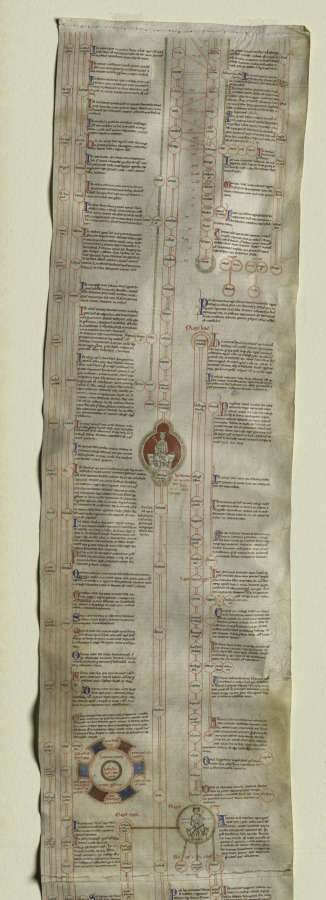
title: Peter of Poitiers's "Compendium Historiae in Genealogia Christi"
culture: England, Canterbury, 13th century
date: c. 1220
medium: ink and tempera on a vellum roll of four membranes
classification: Manuscript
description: This manuscript roll, composed of four membranes formerly stitched together in a continuous roll about nine feet long, has been divided in the middle for easier visibility and study. The text is an abridgment of biblical history focused on the descent of Christ from Adam. It was written by Peter of Poitiers (about 1130–1205), who taught theology and history in Paris and was widely copied. The present roll is an English copy of Peter's text made shortly after his death. Although manuscript rolls were hung on the walls of a classroom as instructional aids to students, some of them have value beyond their textual and historical interest because of the fine quality of their drawings, as seen here. A comparison with Canterbury manuscripts and stained glass of around 1220 is the basis for the attribution to Canterbury. Peter of Poitiers's aim in this project was to assist students prevented from mastering biblical history because of its length and because they were too poor to own books. His text on roll is the briefest possible summary of biblical history. It is arranged in six historical stages, denoting the six ages of the world, as decreed by theological tradition. The first five ages were inaugurated by Old Testament individuals: Adam, Noah, Abraham, David, and Sedecias. The birth of Christ heralded the sixth stage. Beginning at the top of the first membrane, the text consists of brief biographical entries on the ancestors of Christ (Adam, Noah, Abraham, Moses, and David) and other biblical personalities. These extend to the birth of Christ on the fourth membrane, ending with accounts of Hebrew and Roman kings and the Apostles. Each compendium shows the names of the ancestors inscribed within circles, those of direct descent placed vertically in a central column, others scattered in clusters to the right and left. The decoration of the roll consists of a series of medallions of diverse geometrical frames filled with either a figural drawing or a diagram. The style of these pen-and-ink drawings, some illuminated in tempera or tinted with wash, stems from English manuscript and glass painting attributed to the school of Canterbury Cathedral. The style of the museum's illustrations is so close to the stained glass panels made for Trinity Chapel at Canterbury (about 1220) to suggest that an artist active as a glazier in the Cathedral workshop may also have executed the manuscript. In the least, the painter of the roll manuscript was familiar with the style of the painted glass, and on this basis, a date of about 1220 seems appropriate. Additional evidence is supplied by a psalter illuminated at Canterbury shortly before 1220. The figurative scenes in this psalter were apparently illustrated by the same hand that executed the line and wash drawings in the museum's roll.